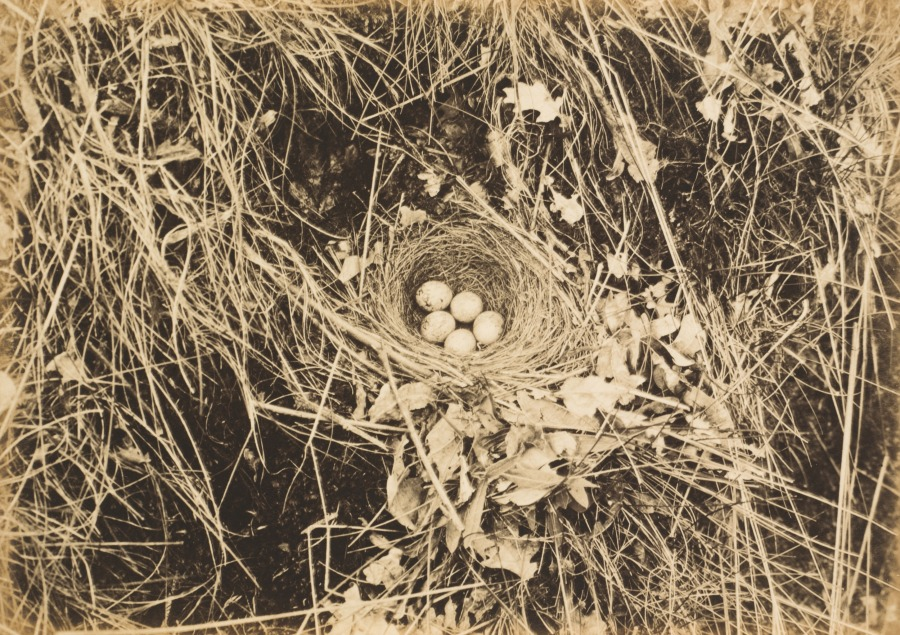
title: Yellowhammer Nest with Eggs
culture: Netherlands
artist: Richard Tepe (Netherlandish, 1864–1952)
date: 1900s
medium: gelatin silver print on printing-out paper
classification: Photograph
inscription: Written in pencil on verso: "Nest and Curder Goldammes" Written in pencil on verso: "Foto/R. Tepe (signed)"